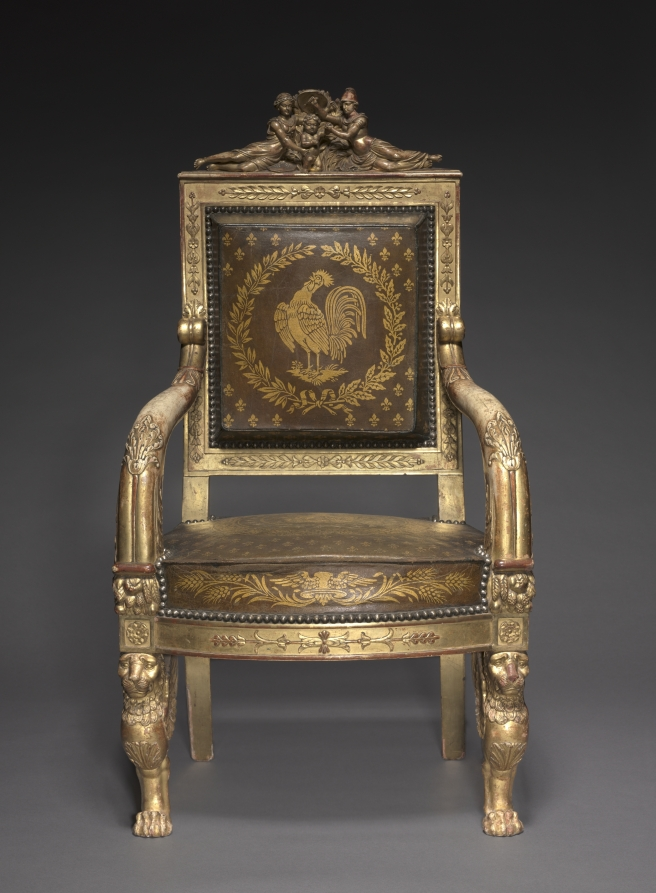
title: Child's Throne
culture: France, Paris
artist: Pierre-Marie Balny le Jeune (French, 1832)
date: 1822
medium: carved and gilded wood, leather upholstery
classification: Furniture and woodwork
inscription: inscribed with stencils inside back rail: BLONDEL TAPISSIER/RUE ST. ANTOINE N 72 1822 inscribed in ink lower edge back rail: 12 JANVIER 18[22?]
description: This chair was made for the young, presumed successor to the French throne who ruled briefly as Henri V in 1830, the last of the direct Bourbon line. He is depicted at the center of the top rail protected by female figures representing France and Minerva, the Roman goddess of wisdom. Fleurs-de-lis and the Gallic rooster, symbols of French royalty and the French people, decorate the upholstery.